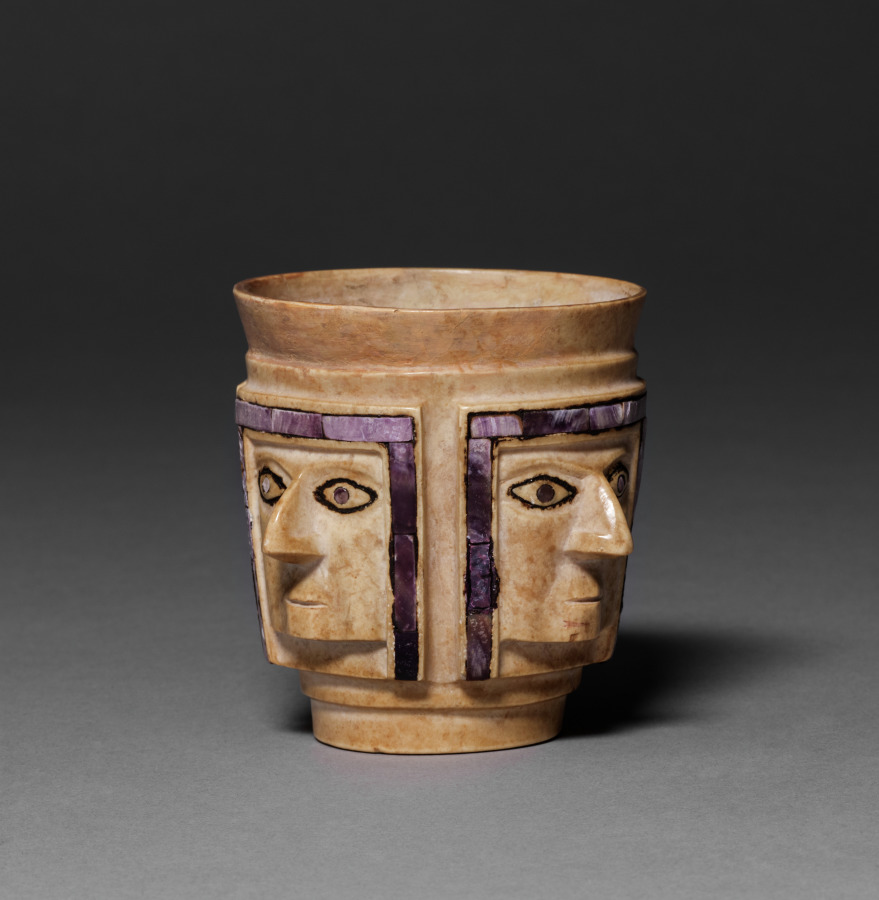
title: Cup with Four Faces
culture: Central Andes, Wari people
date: 600–1000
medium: Stone with shell inlay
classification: Stone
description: The identity of the four, wide-eyed faces on this cup is unknown. Equally mysterious is the cup’s function. It seems too small to be used for drinking beer at the feasts the Wari sponsored to put others in their debt. The size may suggest the cup was used in more intimate circumstances, perhaps to make libations to sacred forces that animated the ancient landscape.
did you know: The inlay is made of spondylus (thorny oyster) shell, a form of wealth in antiquity.